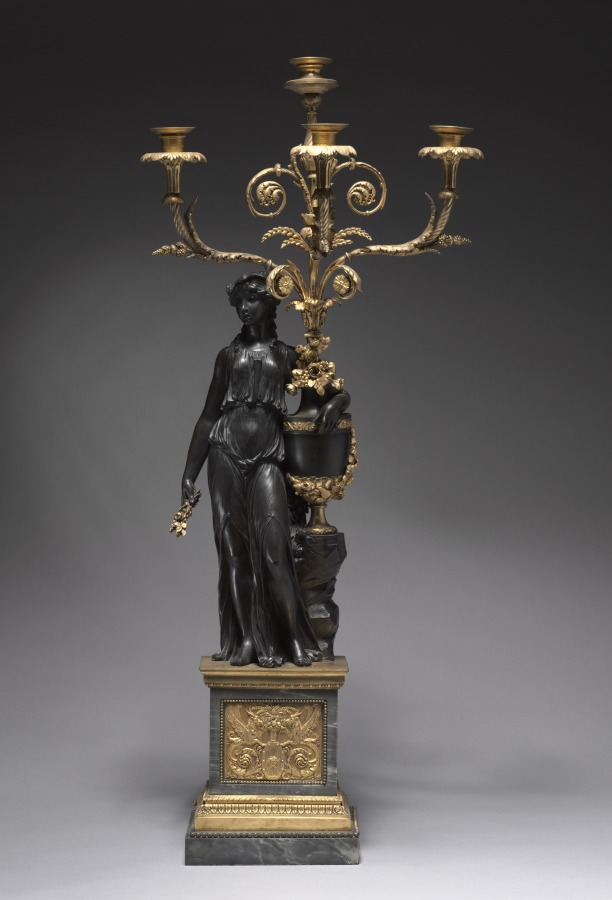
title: Candelabrum Pair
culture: France, 18th century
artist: attributed to Pierre Philippe Thomire (French, 1751–1843)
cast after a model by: Clodion (French, 1738–1814)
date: c. 1780–1785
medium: bronze, gilt bronze, gray marble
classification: Sculpture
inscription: signed behind rock: CLODION.